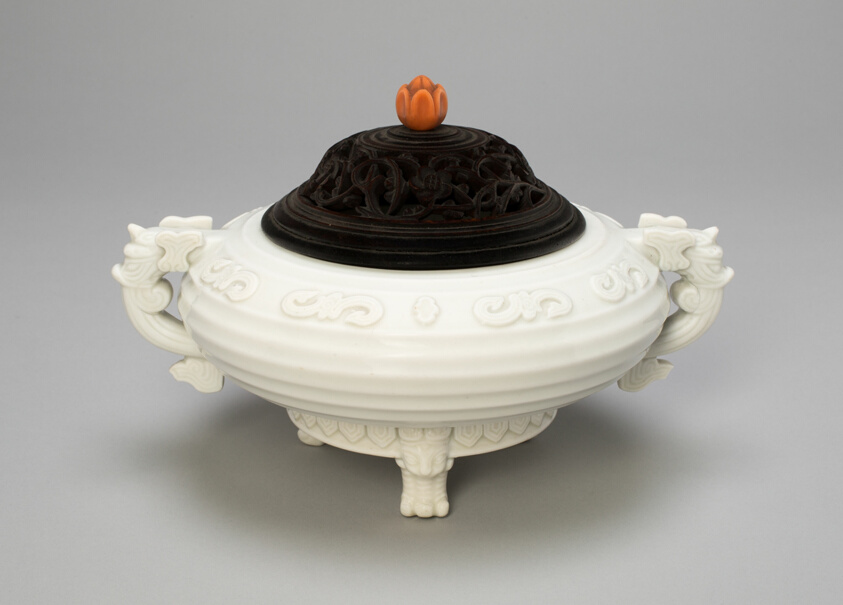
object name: Vessel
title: Censer in the Form of Ancient Bronze Tureen (gui)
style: Chinese (culture or style)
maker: China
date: Qing dynasty (1644–1911)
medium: Porcelain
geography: China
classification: porcelain; asian art; ceramics; vessel